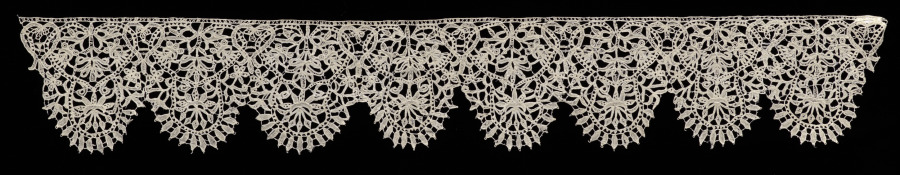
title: Lace Collar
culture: Italy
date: 1600–1640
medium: Needle lace (punto in aria)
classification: Lace